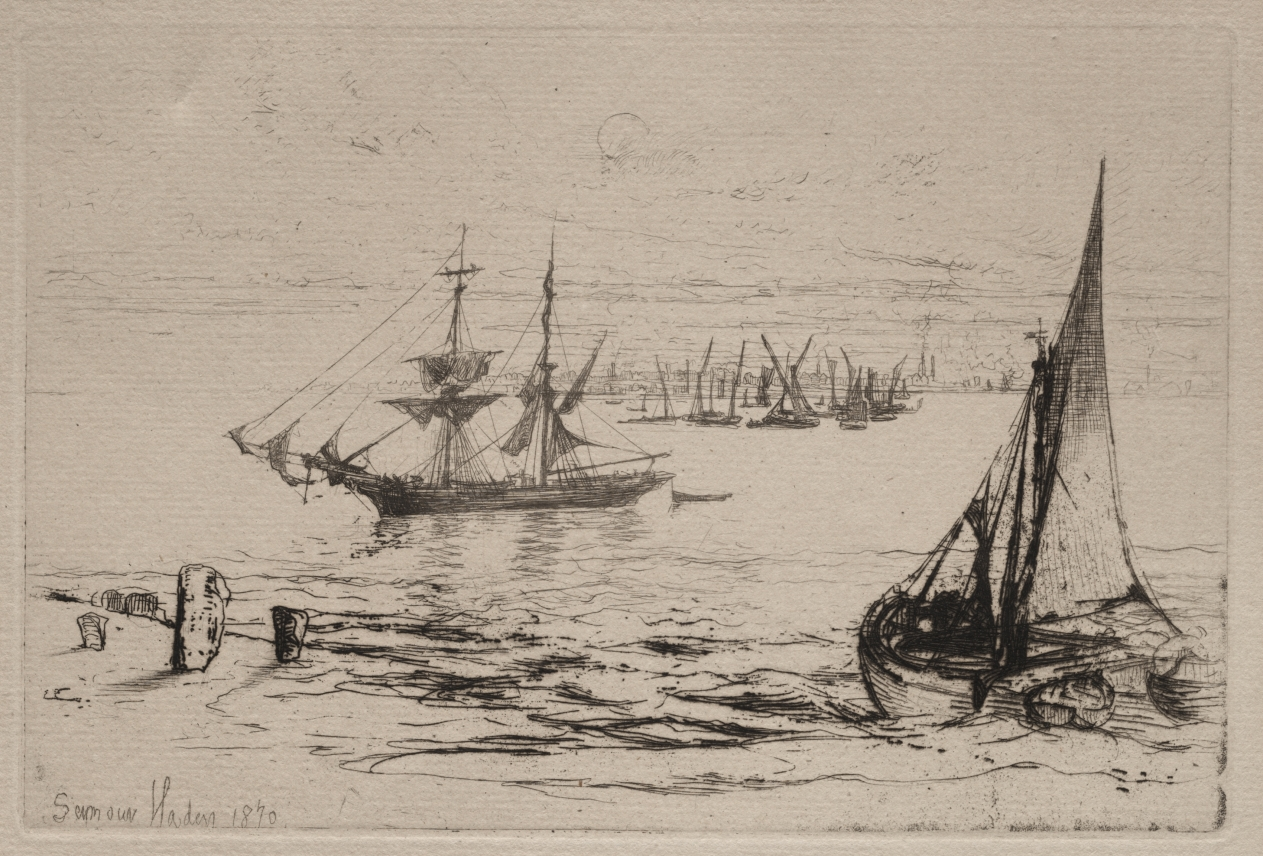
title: A Brig at Anchor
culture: England, 19th century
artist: Francis Seymour Haden (British, 1818–1910)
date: 1879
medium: etching and drypoint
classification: Print